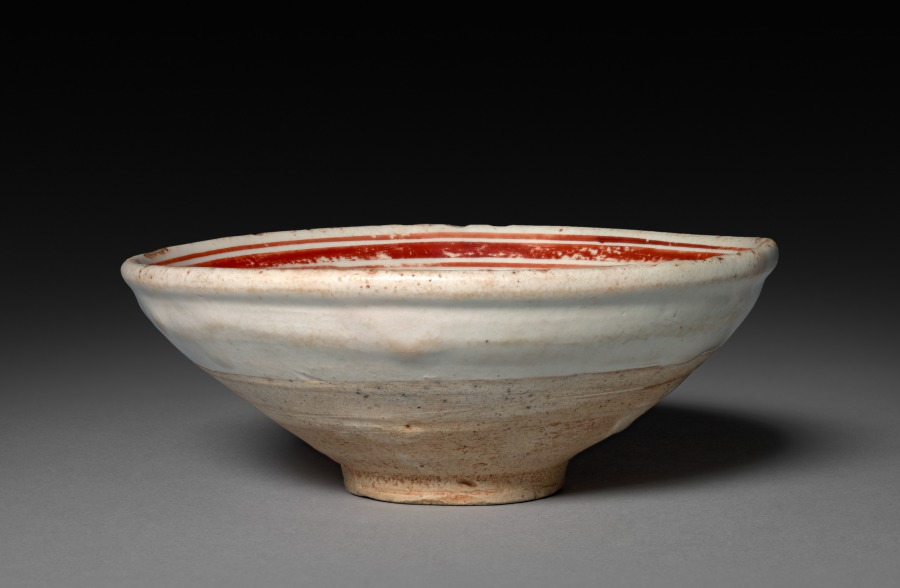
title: Cup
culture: China, Jin dynasty (1115-1234)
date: 1100s–1200s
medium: buff stoneware with underglaze slip application and overglaze enamel decoration, Cizhou ware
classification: Ceramic